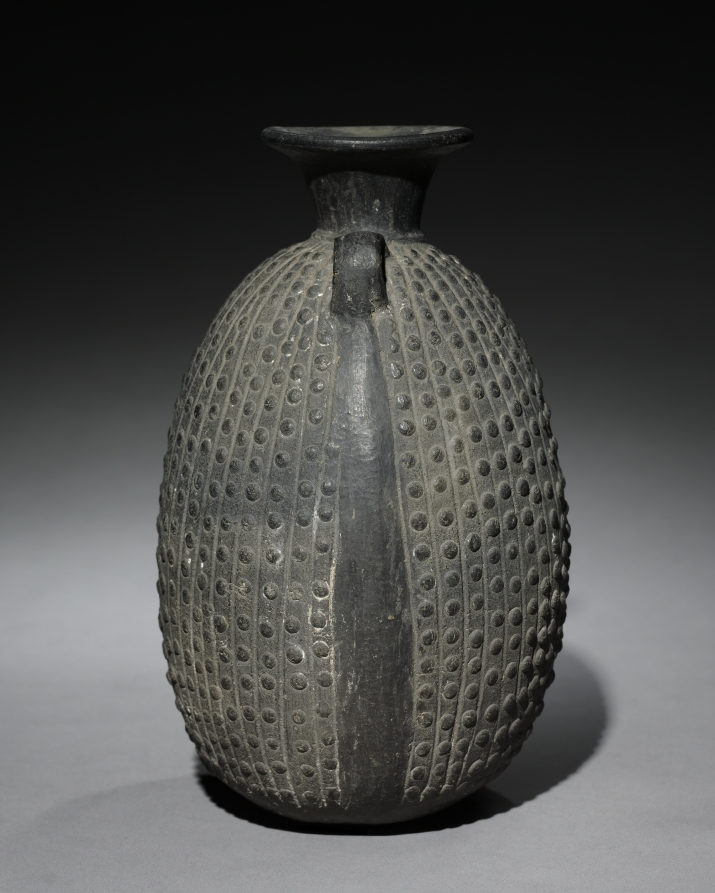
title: Darkware Vessel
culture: Peru, North Coast, Chimú style (900-1470)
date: late 1400s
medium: black ware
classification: Ceramic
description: Under the Chimú, whose empire stretched for 800 miles along the Peruvian north coast, the value of ceramics fell, perhaps because high-status vessels were made of precious metals. Accordingly, ceramics were mass-produced with molds and, rather than bearing painted scenes, often have an overall dark surface achieved by firing in a smoky atmosphere. This firing method was also used for very early Andean ceramics, including the example at the far left. We don't know whether the Chimú revived the method to venerate earlier cultures. The vessel with the stripped surface was made after the Chimú were conquered by the Inka in the late 1400s.